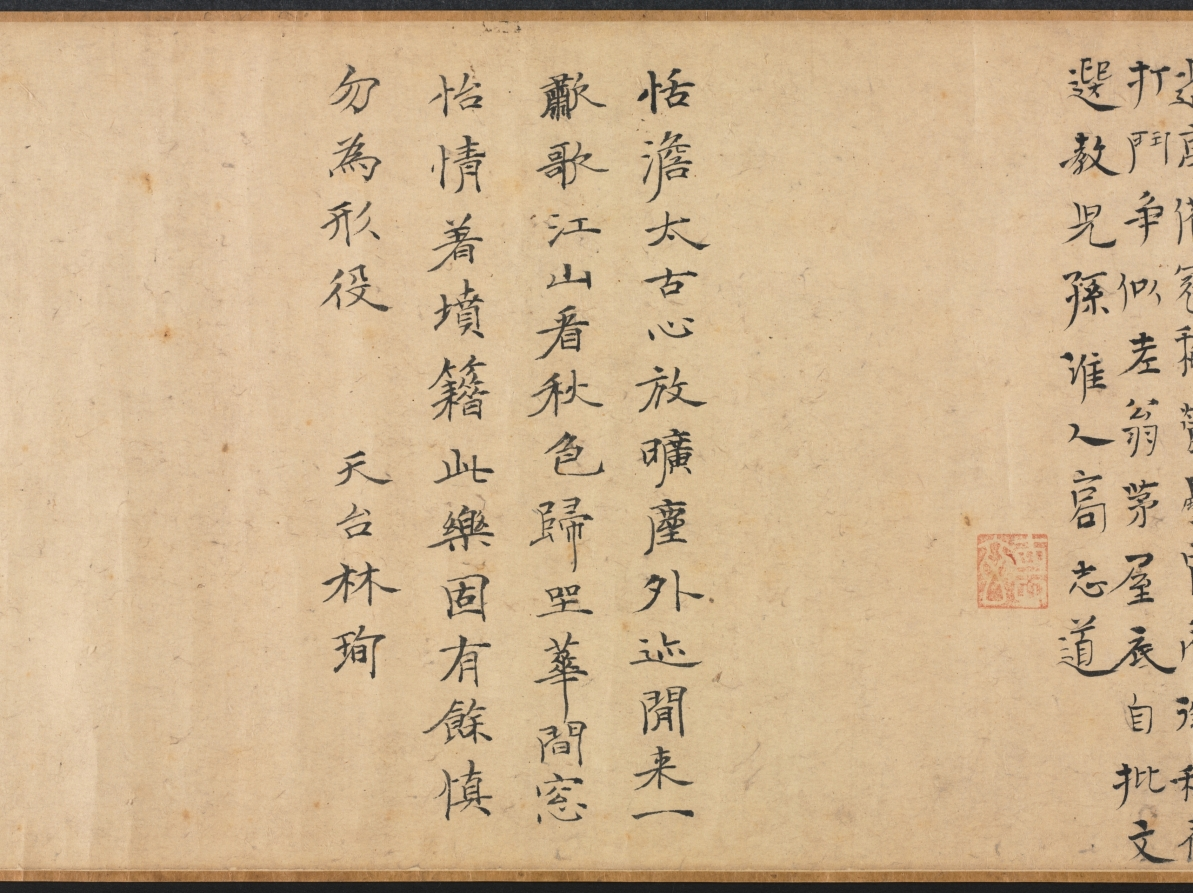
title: Leisure Enough to Spare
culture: China, Yuan dynasty (1271-1368)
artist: Yao Tingmei (Chinese, active mid-1300s)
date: 1360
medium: handscroll, ink on paper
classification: Painting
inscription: 至正廿年春正月_日作此併系鄙語于尾 地偏人遠閉柴關，滿院松陰白晝閒。 眼底風塵渾忘却，坐看流水臥看山。 吳興姚廷美畫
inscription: 23 colophons and 53 seals (dates unavailable for some): 1 colophon, dated 1360, and 2 seals of Yang Weizhen (1296-1370); 1 colophon and 3 seals of Wan Yi; 1 colophon of Zhang Junde; 1 colophon and 3 seals of Angji (act. ca. mid-14th c.); 1 colophon and 1 seal of Xu Shiquan; 1 colophon and 3 seals of Gao Yu; 1 colophon and 2 seals of Li Mingfu; 1 colophon and 2 seals of Lu Lin; 1 colophon and 1 seal of Zhang Qian; 1 colophon of Tao Tangwen; 1 colophon and 1 seal of Wu Yuangui (act. ca. 1300-60); 1 colophon of Bao Jiong; 1 colophon of Wang Zao; 1 colophon and 1 seal of Ma Chuyi; 1 colophon and 1 seal of Lin Yizhuang; 1 colophon and 1 seal of Gu Shunju; 1 colophon and 2 seals of Wang Jing; 1 colophon and 2 seals of Lin Shouchang; 1 colophon and 1 seal of Gao Zhidao; 1 colophon of Lin Xun; 1 colophon, dated 1359, and 2 seals of Meng Weicheng (act. mid-14th c.); 1 colophon and 1 seal of Meng Zhiji (act. mid-l4th c.); 14 seals of Liang Qingbiao 梁清標 (1620-1691); 1 poem dated 1755 and 5 seals of the Qianlong 乾隆 emperor (r. 1736-95); 2 seals of the Jiaqing 嘉慶 emperor (r. 1796-1821); 3 seals of the Xuantong 宣統 emperor (r. 1909-11).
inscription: Title on frontispiece by Zhang Bi 章弼: Signed Gongchen 拱辰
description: Seclusion and leisure—the ideals of the literati, or scholar-gentlemen—are expressed in this mature work by Yao Tingmei. The theme acquired special meaning at a time of the military uprisings near the end of the Yuan dynasty. Dedicated to an ascetic named Du, this work combines painting, calligraphy, and poetry; following the painting are more than 20 poems and essays written by notable scholars, one of whom was the calligrapher Yang Weizhen. It reveals not only the aesthetic taste of the literati but also the practice of contributing artistic and literary works to fulfill social obligations. Yao's painting demonstrates his individual style derived from various ancient masters (Guo Xi, Dong Yuan, and Juran). Yang Weizhen's calligraphy exhibits his bold, vigorous style and his intent to capture the spirit of antiquity in art.